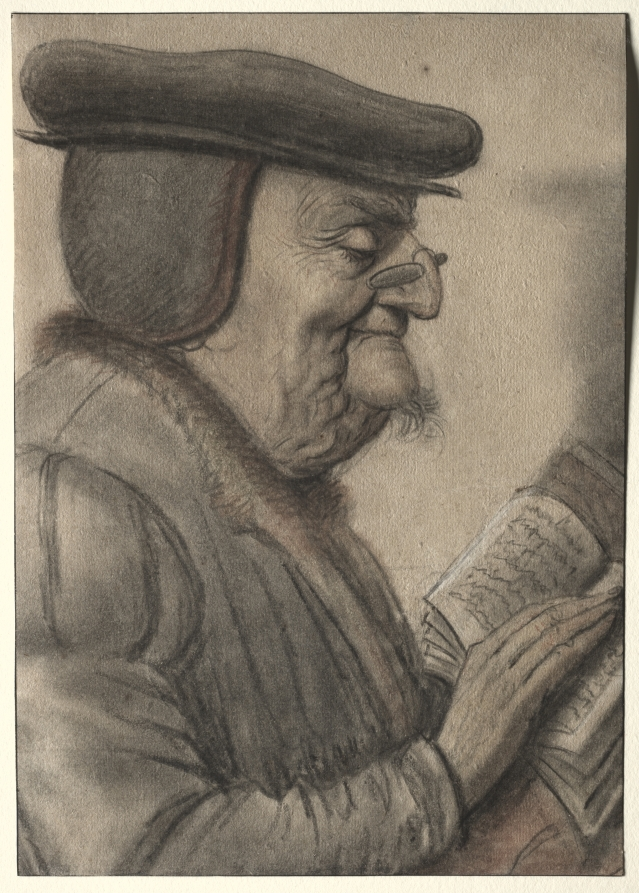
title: Elderly Man Reading a Book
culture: France, 17th century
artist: Nicolas Lagneau (French, 1590–1666)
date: first half 1600s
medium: black, red, white and chalk, with stumping; framing lines in black ink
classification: Drawing